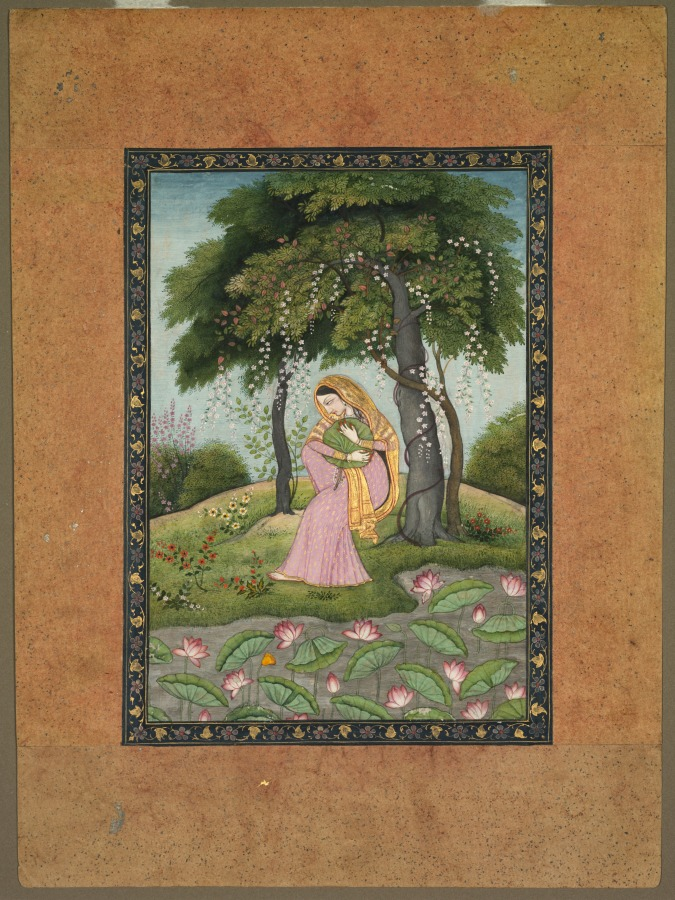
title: Virahini Nayika, Love-Torn Heroine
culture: India, Pahari Hills, Kangra school, late 18th-early 19th Century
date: c. 1800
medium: Gum tempera, ink, and gold on paper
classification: Painting